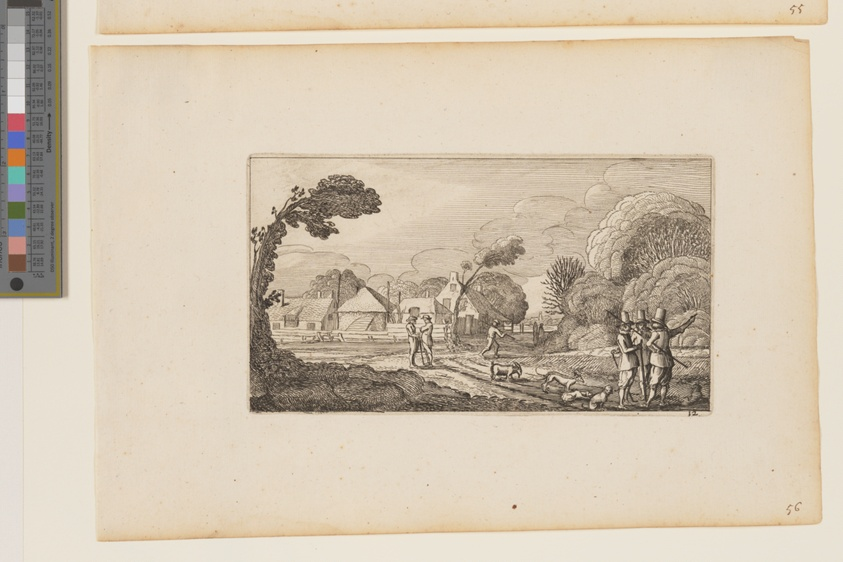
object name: Print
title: Several Men on Path Before a Farm, from Twelve landscapes with Figures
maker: After Gillis van Scheyndel; Dutch, 1595–1660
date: 1624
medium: Etching on ivory laid paper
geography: Netherlands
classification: etching; paper; print; prints and drawing